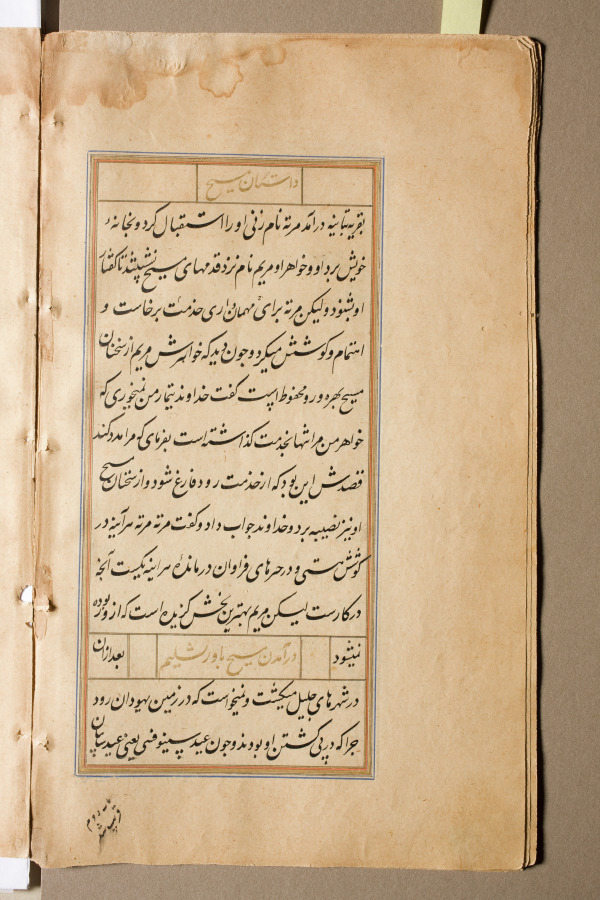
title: Text page from a Mirror of Holiness (Mir’at al-quds) of Father Jerome Xavier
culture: Mughal India, Allahabad, made for Prince Salim (1569–1627)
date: 1602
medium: Ink and gold on paper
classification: Manuscript